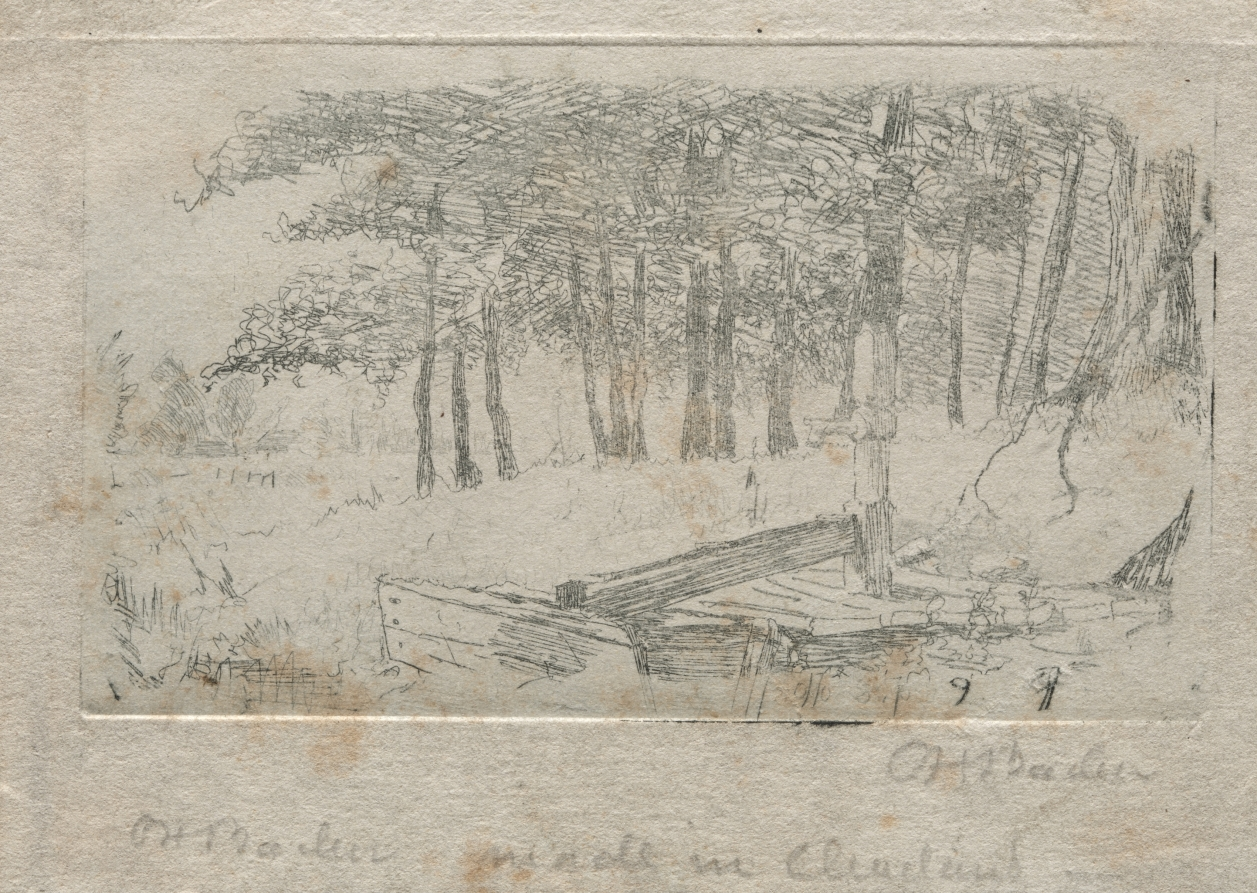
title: Sketch from Nature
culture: America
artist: Otto H. Bacher (American, 1856–1909)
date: 1879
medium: etching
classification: Print